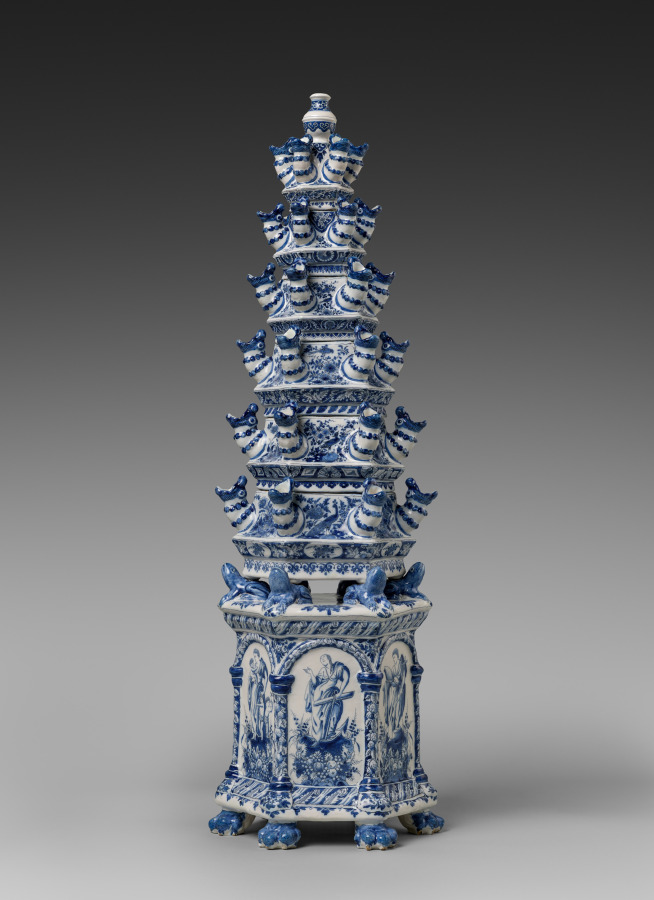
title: Flower Pyramid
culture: Netherlands, Holland, Delft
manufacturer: Adrianus Kocx (Dutch, active 1686–1701)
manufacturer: De Grieksche A (The Greek A) Factory (Netherlands, 1658–1811)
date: c. 1690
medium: Tin-glazed earthenware, painted in blue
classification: Ceramic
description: Allegorical figures representing Faith, Hope, and Love decorate the base of this pyramid, on which rest six tiers with spouts where flowers can be placed. Flower pyramids are among the most complex and luxurious types of ceramics produced in Delft in the late 1600s. This example was made in the Greek A Factory, owned by Adrianus Kocx. During his tenure, the factory became the most prestigious of Delft potteries and received commissions from Queen Mary II, who ruled over England, Scotland, and Ireland together with her husband, William III. She contributed to the international spread of the fashion for Delft ceramics.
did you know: The iconic blue-and-white ceramics from Delft originated as an attempt to copy Chinese porcelain.